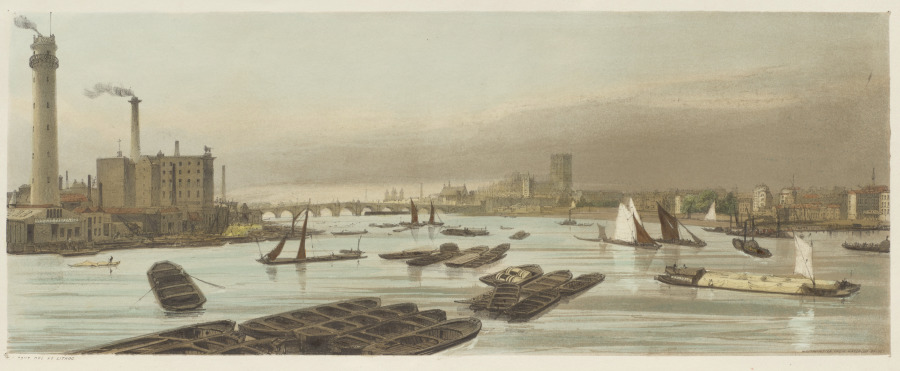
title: London As It Is: Westminster, from Waterloo Bridge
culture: England, 19th century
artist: Thomas Shotter Boys (British, 1803–1874)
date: 1842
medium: lithograph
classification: Bound Volume